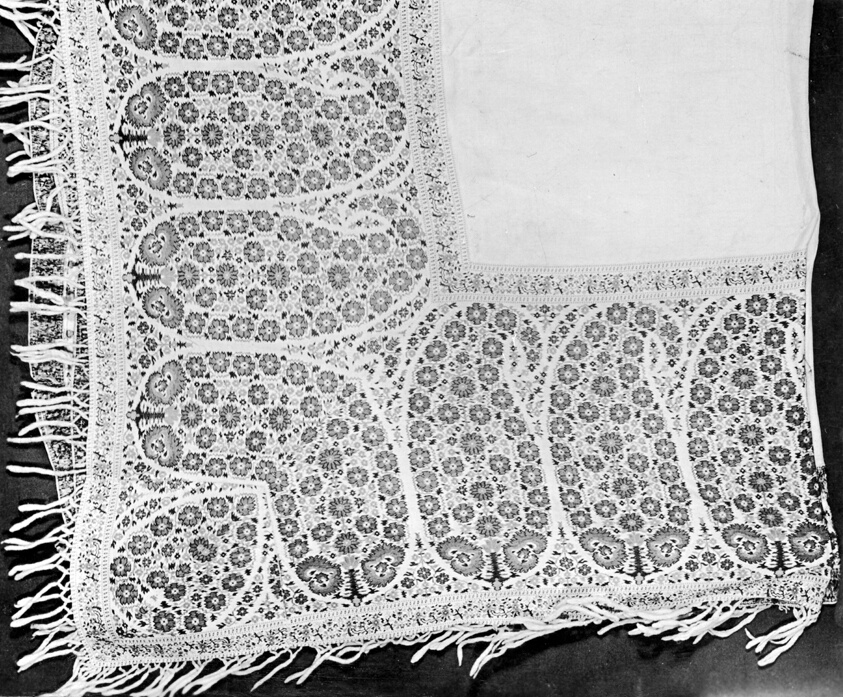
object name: Costume and Accessories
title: Shawl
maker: Possibly England, Norwich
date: 1810/15 (reworked 1825/35)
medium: Wool and silk, twill weave, brocaded; fringed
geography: England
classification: textile; weaving; costume; dress (garment); clothing